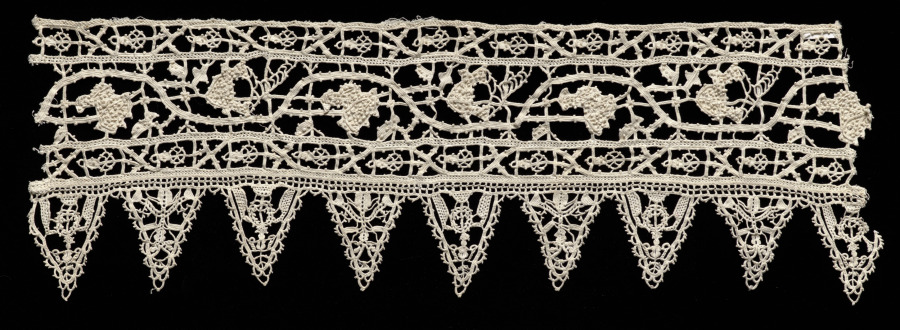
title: Lace Cuff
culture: Italy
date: 1500s–1600s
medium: Linen: needle lace (punto in Aria)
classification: Lace